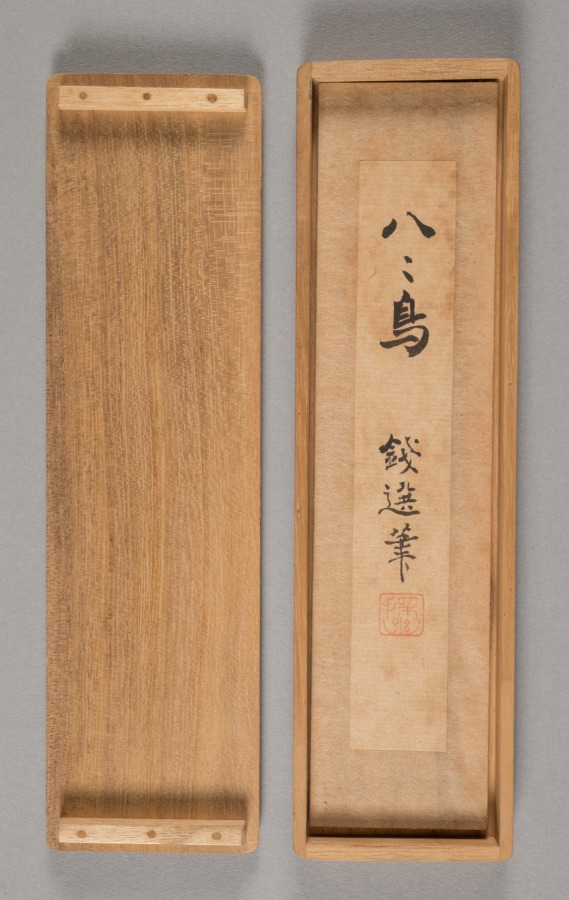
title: Crow on a Pomegranate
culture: Japan, Muromachi period (1392–1573)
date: 1500s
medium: hanging scroll; ink on paper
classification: Painting